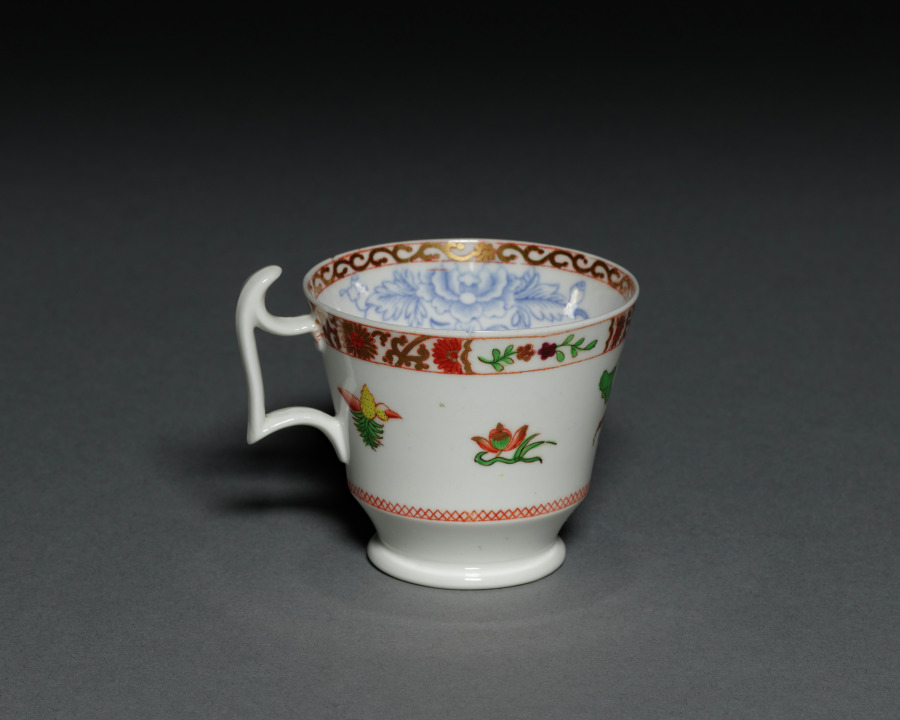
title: Cup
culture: England, Staffordshire, 18th-19th century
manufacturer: Spode Factory (British)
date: 1700s-1800s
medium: porcelain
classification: Ceramic